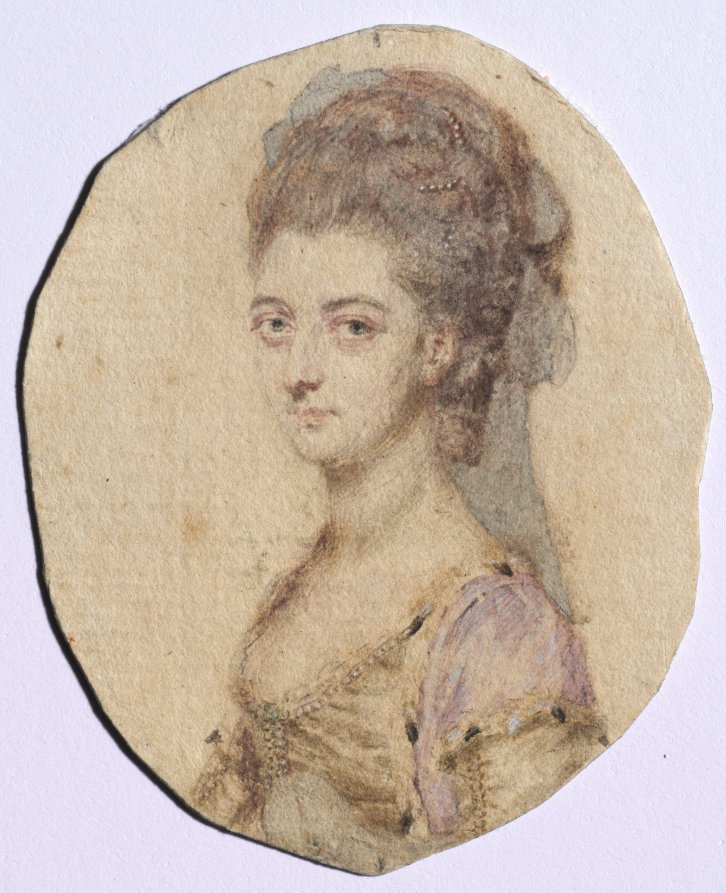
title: Portrait of Charlotte Bertie, née Warren, 4th Countess of Abingdon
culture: England, 18th century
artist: John I Smart (British, 1741–1811)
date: 1778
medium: graphite and wash on laid paper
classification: Portrait Miniature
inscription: inscribed on verso of paper to top in brown ink: [L]ady Abingto[n] 1778; inscribed at bottom of verso in graphite: J Smart / Lady Abington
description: Although it is impossible to say if it was always part of the artist’s process to execute a preparatory sketch prior to painting each miniature, we do know that John Smart retained many hundreds of these sketches. A group of preparatory sketches—of which this portrait is one—descended through the Smirke family after Smart’s daughter Sarah gave a sketchbook containing preparatory portrait studies to her friend Mary Smirke, sister of the celebrated Victorian architect Sydney Smirke. This book was probably broken up around 1877 when it was divided between Sydney’s daughters Mary Jemmett and Mrs. Lange, whose portions were both sold at auction in 1928. G. C. Williamson was the first to suggest that Smart’s sketches were well known and that they were preparatory studies for the painted miniatures. Williamson listed the names of sitters from the sketches known to him at the time, and they included Lady Abingdon. Here, Lady Abingdon’s head and shoulders face right. Her brown hair is dressed high on her head, and a strand of pearls is woven through the left side of her coiffure. A veil descends from the top of her head, past her shoulders. She has gray eyes. Compared to his contemporaries George Engleheart (1752–1829) and Andrew Plimer (1763–1837), whose female sitters were often painted in similar simple white gowns, Smart often lavished more attention on the costumes in his portraits of women, whose dresses incorporated colored silks, printed fabrics, and luxury trimmings like lace and fur. Thus, Lady Abingdon wears a low-necked, pink dress trimmed with ermine and strands of pearls. The background is unpainted. The removal of the paper backing revealed an inscription in brown ink, written in Smart’s hand, dating the work and verifying the identity of the sitter as Lady Abingdon. Lady Abingdon (d. 1799) was the daughter of Admiral Sir Peter Warren, K.B., M.P. She married Willoughby Bertie, 4th Earl of Abingdon, in 1768. They had six children, two of whom died very young. It is for Lady Abingdon that Abingdon Square in New York City is named, courtesy of her father, who had purchased 300 acres of land in Greenwich Village in 1744. Her husband’s famous protestations against the British government’s treatment of America during the War for Independence ensured that even in 1794, when the New York city council was rooting out British names from public streets and spaces, the name of Abingdon Square was retained. The family was painted by some of the great artists of the day, including Nathaniel Dance-Holland (1735–1811) and John Francis Rigaud (1742–1810). The formal portrait of 1769 by Dance-Holland, in which Lady Abingdon is depicted in coronation robes and holding her peeress’s coronet, conveys the pomp and tradition expected from a marriage portrait of a powerful peer. But even Smart’s miniature portrait sketch of almost a decade later maintains some of this grandeur, depicting the countess with aristocratic bearing and wearing the rich ermine-trimmed gown to which her station entitled her. A miniature on ivory corresponds to this preparatory sketch, although it is dated 1777, suggesting that the sketch may have been executed the following year in preparation for a second version of the portrait. There are slight differences in the details of the dress, particularly the left sleeve—which has been lengthened—and a slight reduction in pearl and ermine trim. The portrait on ivory also has somewhat more softness in the facial features, but many of the details, including the veil and the lock of hair on the right shoulder, are extremely similar. The miniature’s current location is unknown.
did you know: Sketches helped John Smart work out the particulars of a portrait before commencing the miniature on ivory, and they were useful in the event that a duplicate might later be required.